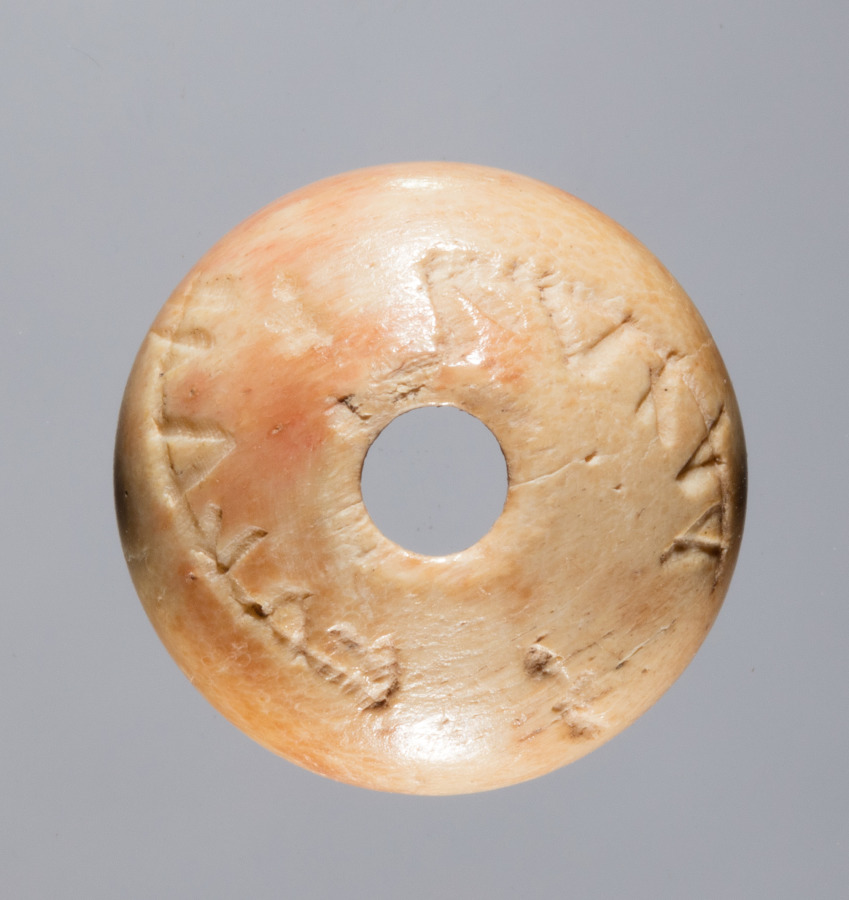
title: Spindle Whorl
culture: Iran, early Islamic period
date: 700s - 900s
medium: bone, incised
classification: Spindle Whorl